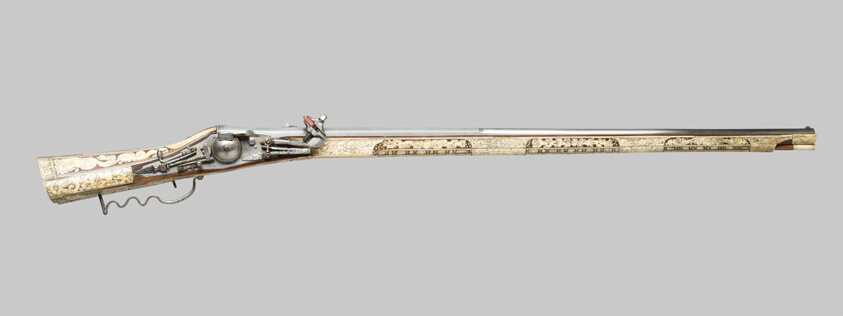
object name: Arms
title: Wheellock-Matchlock Gun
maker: German; Thuringia (Possibly Suhl)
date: 1580/1600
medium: Steel, walnut, and horn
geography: Suhl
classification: firearm-long gun; arms; arms and armor